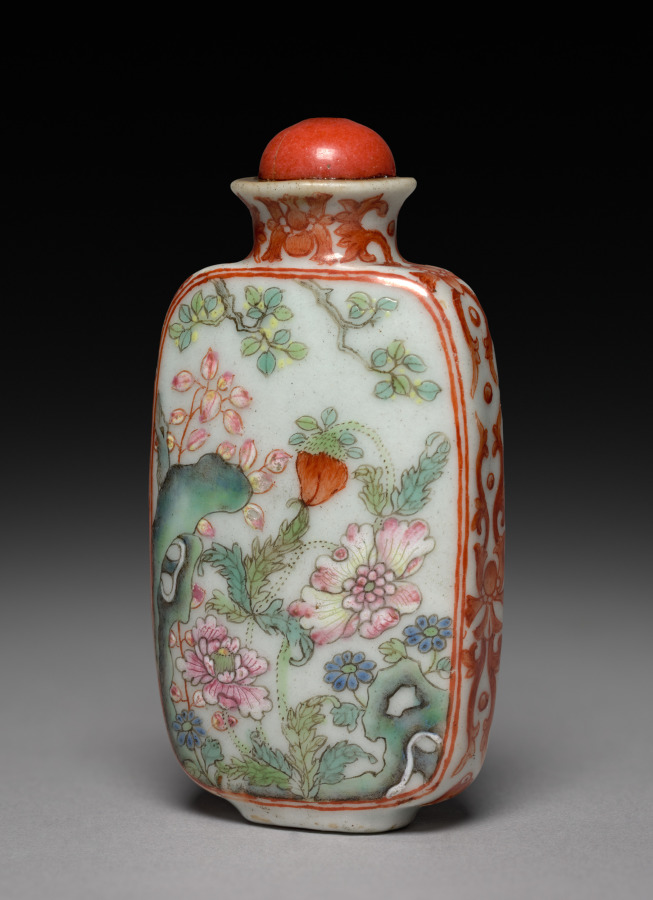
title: Snuff Bottle with Stopper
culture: China, Qing dynasty (1644–1911), Qianlong reign (1736–95)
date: 1736–95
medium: porcelain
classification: Ceramic